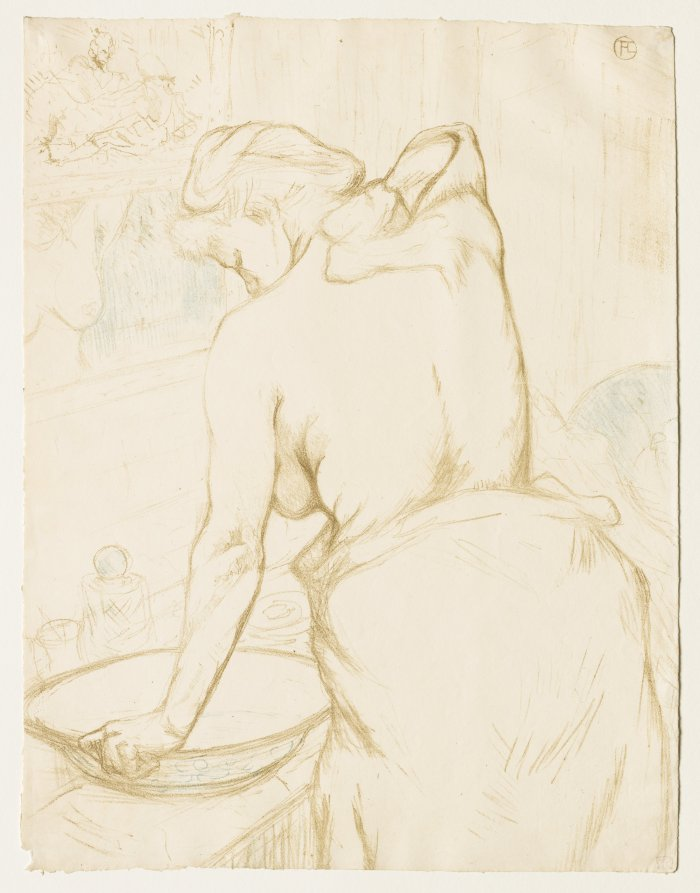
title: Elles: The Toilet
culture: France, 19th century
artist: Henri de Toulouse-Lautrec (French, 1864–1901)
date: 1896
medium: color lithograph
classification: Print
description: The French publisher Gustave Pellet, hoping to attract new customers, persuaded Lautrec to make a series of ten prints, plus frontispiece and cover, depicting brothels. Although it was not unusual to see prostitutes pictured in the popular press, Lautrec was the first well-known, successful artist to tackle this subject. The set was a commercial failure when it first appeared, perhaps because the scenes are not erotic. Lautrec had said that "they are women to my liking", and between 1892 and 1895 he often lived in various Parisian brothels for weeks at a time. This allowed him to witness the daily lives of the women, including the intimate acts of sleeping and bathing, and to sense their suffering. The result is that only two of the scenes show prostitutes as desirable temptresses. The remainder depict the mundane routine of the women's private world, their caring for each other, their boredom, and, living on the periphery of society, their sense of isolation. Lautrec did not take a direct moral stand. He portrayed the women sympathetically, restoring to them their humanity. One scene shows Juliette Baron, whose life of vice has led to premature aging, bringing her daughter Paulette breakfast. Other images depict the women at private moments, bathing or combing their hair in natural, relaxed poses, unaware of being observed. The beauty of the drawing and use of color makes this set one of the masterpieces of late nineteenth-century French color lithography.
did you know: This print belongs to a portfolio published by the dealer Gustave Pellet, who created a special luxury paper that featured a watermark of his initials.